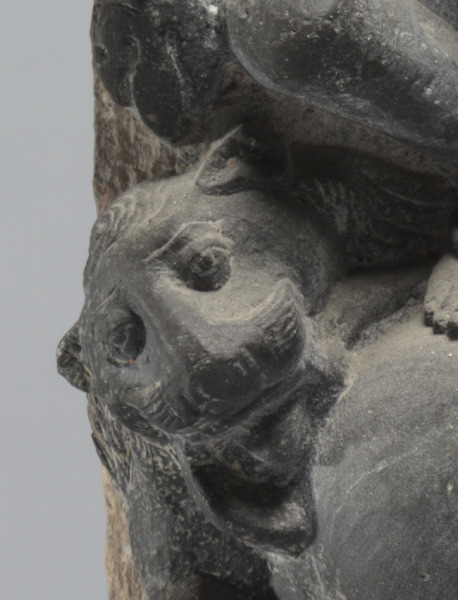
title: Durga Slaying the Buffalo Demon Mahisha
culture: India, Badra, Central Northeastern style, early Medieval, 9th century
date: 800s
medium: stone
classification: Sculpture